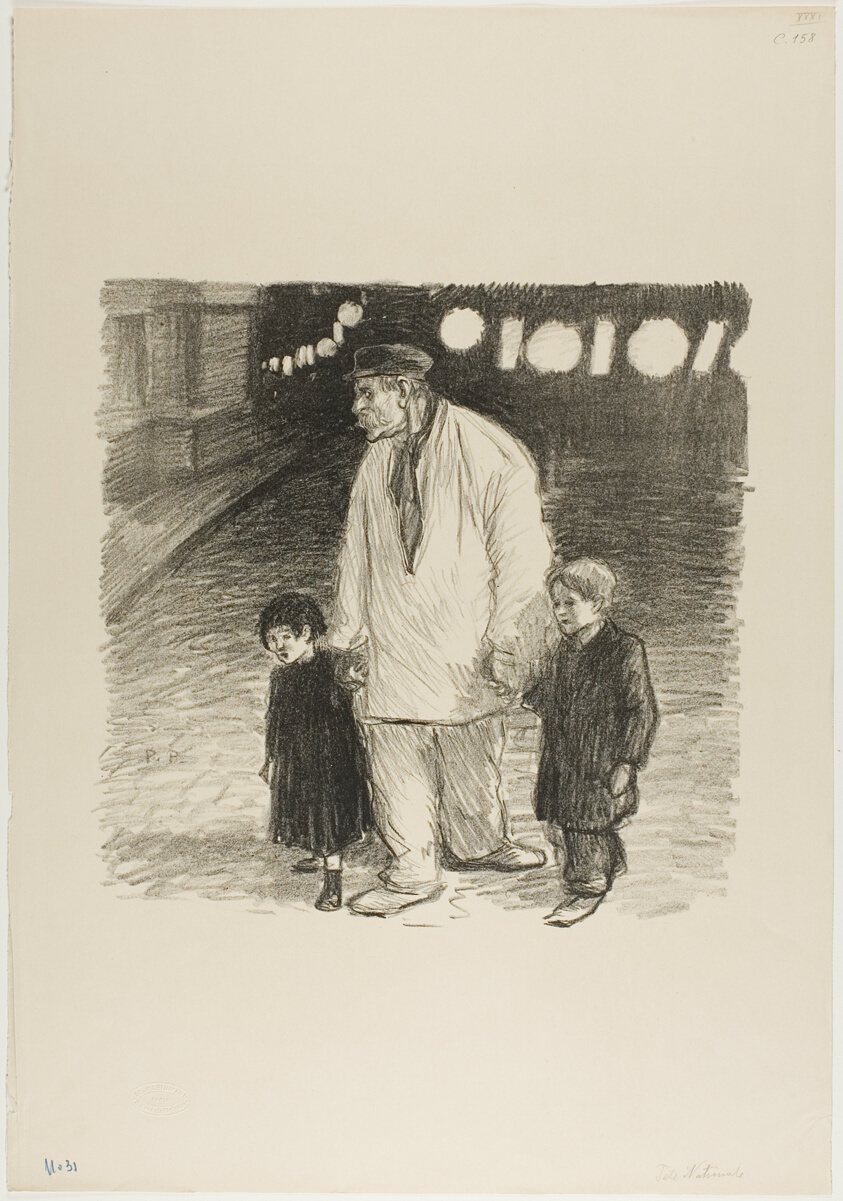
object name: Print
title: National Holiday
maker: Théophile-Alexandre Steinlen; French, born Switzerland, 1859-1923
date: July 1894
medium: Lithograph in black on cream wove paper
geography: France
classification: lithograph; print; prints and drawing